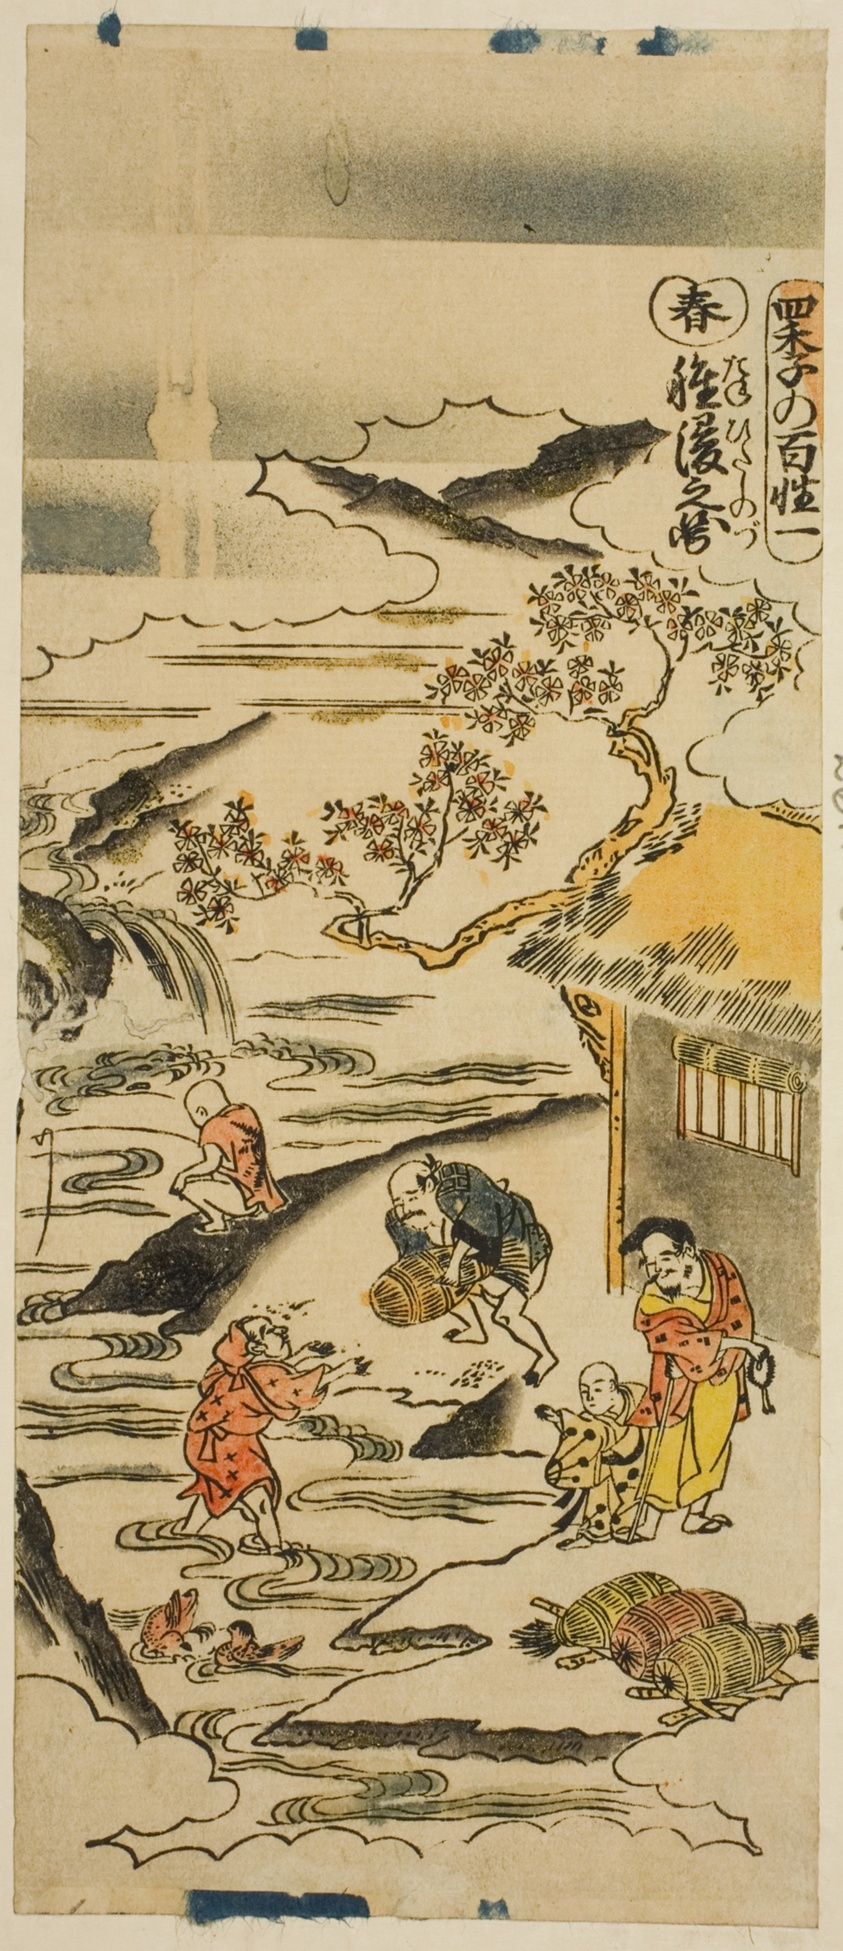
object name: Print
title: Spring: Soaking Rice Grains (Haru: tanehitashi no zu), No. 1 from the series "The Four Seasons of Farmers (Shiki no hyakusho)"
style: Japanese (culture or style)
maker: Torii Kiyomasu II (Japanese, 1706 (?)–1763 (?))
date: c. 1730s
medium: Hand-colored woodblock print; hosoban, urushi-e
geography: Japan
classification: woodblock print; print; asian art